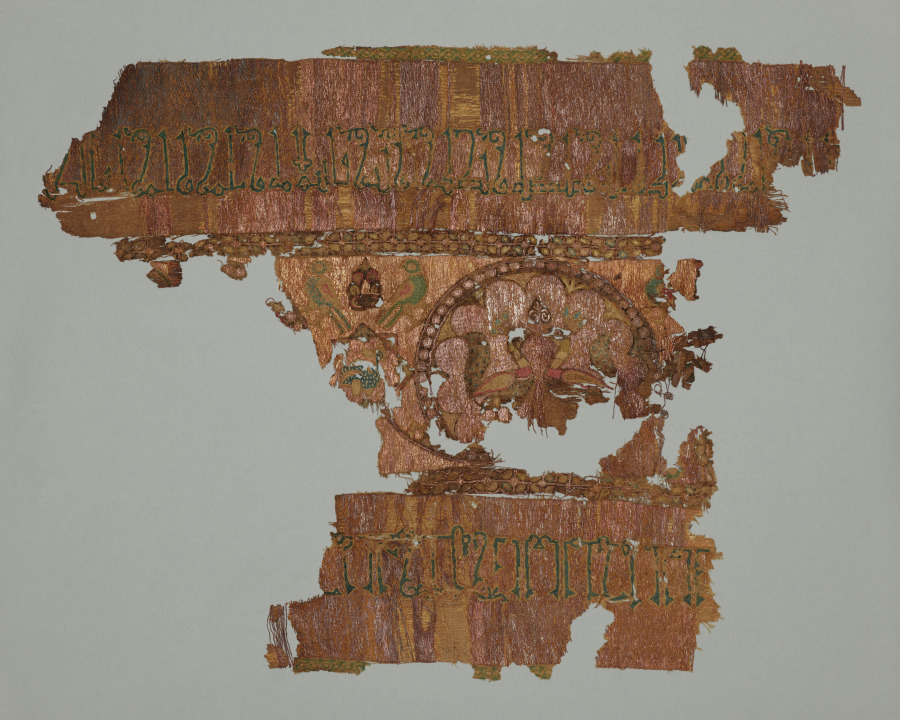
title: Fragment with peacocks and inscription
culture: Iraq, probably Baghdad, Seljuq period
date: 1000–1100s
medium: Silk warp and cotton weft (mulham): plain weave; silk, gilt, and silver thread: embroidery, couched and split stitches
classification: Embroidery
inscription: [bottom]: ". . . [the Compassiona]te [?]. Praise be to God, Lord of the worlds and the wor[lds?]." [top]: ". . . command and glory and power and good fortune and . . . peace and command and command [one word garbled]."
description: One of the stories in "The Thousand and One Nights" is of a slave girl named Zumurud who lived in Khurasan and embroidered curtains with designs of animals and birds in colored silk and gold threads. Sumptuous embroideries were not only commissioned by rulers, caliphs, and court officials but also widely exported. Today, less than a dozen fragments of these rich embroideries survive. All are worked on "mulham," a fabric having silk warps and cotton wefts that was a specialty of Iran and Iraq. With the exception of the Cleveland Museum of Art's fragment CMA 1952.257, which was found in Baghdad, all of the known examples were preserved until the 1900s in Egyptian graves and refuse heaps.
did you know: The design is arranged in three broad bands; the top and bottom have two opposing lines of Kufic inscription and the center has roundels.